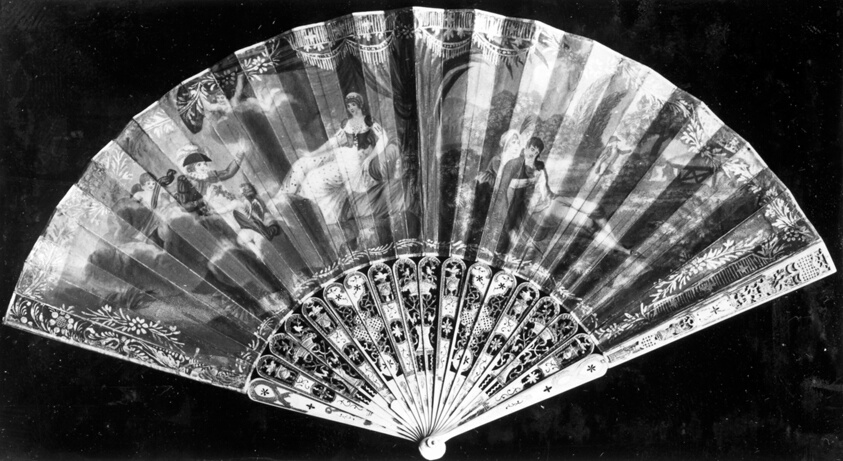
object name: Costume and Accessories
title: Fan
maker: France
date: 1775/1800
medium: Carved and gilded silver ivory sticks and guards; painted paper mount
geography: France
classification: textile; fan - paper; costume accessory - folding fan; costume